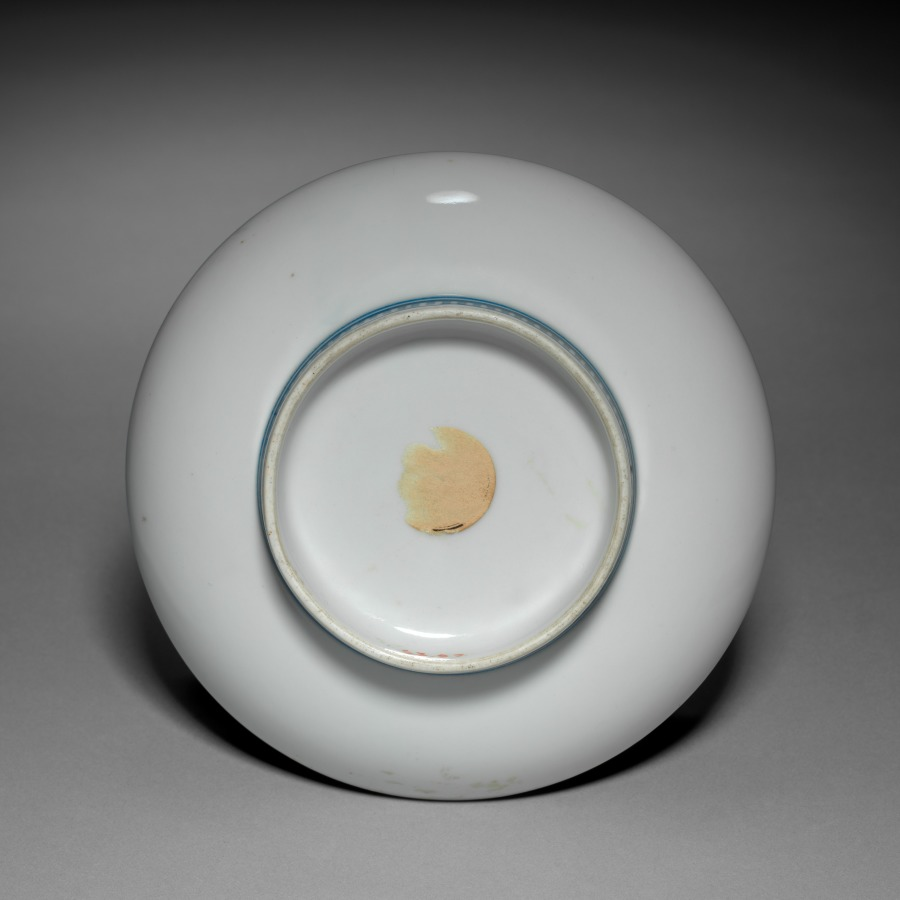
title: Dish with Weeping Cherry Tree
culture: Japan, Meiji period (1868–1912)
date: late 1800s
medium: Porcelain with underglaze blue and overglaze red enamel (Hizen ware, Nabeshima type)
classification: Ceramic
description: This dish depicts a cherry tree (sakuragi) whose flower-laden branches are the centerpiece while the sliver of a trunk and roots appear on the left edge. The sakura blossoms are delicately depicted in an iron-red overglaze. The flowers’ various positions (facing out and downward) and stages of maturity (bud and full bloom) enhance the naturalism and dynamism of the image.